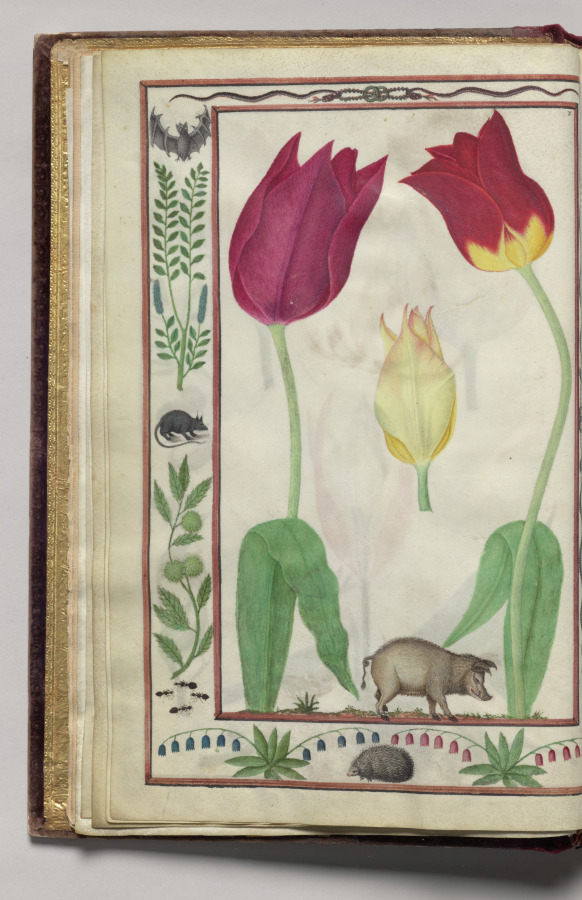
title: Tulips and Boar with Bat, Snake, Rat, and Ants Border, folio 4 (verso), from Florilegium (A Book of Flower Studies)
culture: France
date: 1608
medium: watercolor, ink, silver, and gold over occasional traces of pencil, on vellum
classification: Bound Volume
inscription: Dated: Poitiers 1608 (on frontispiece) Signed: On frontispiece in black ink, lower right: Van Kuyk Notation on drawing: Frontispiece: in pencil, lower margin: * élève de Van Kessel, peintre flammand (* in pencil also appears in front of Van Kuyk's name).